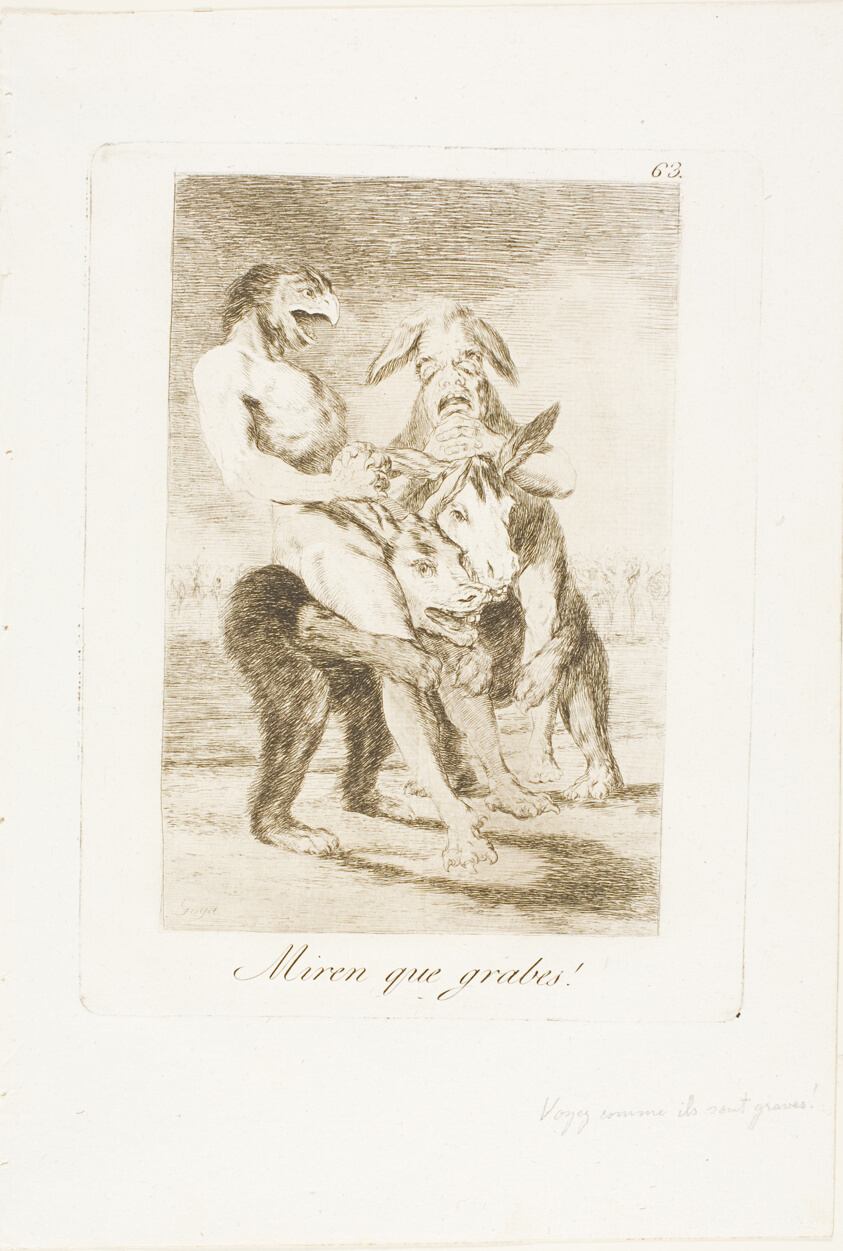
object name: Print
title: Look How Solemn They Are!, plate 63 from Los Caprichos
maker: Francisco José de Goya y Lucientes (Spanish, 1746-1828)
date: 1797/99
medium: Etching and aquatint on ivory laid paper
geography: Spain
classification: etching; print; prints and drawing